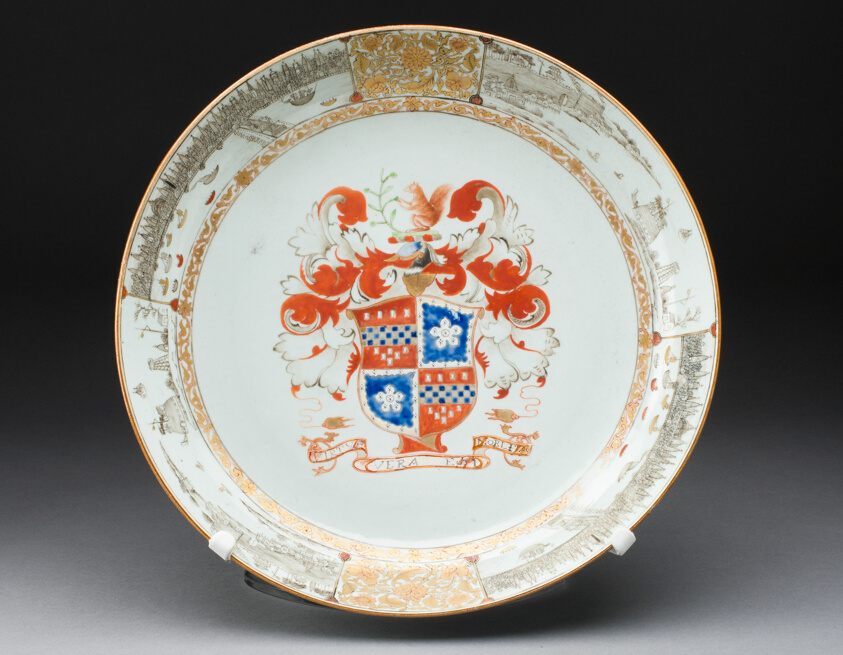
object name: Ceramics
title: Dish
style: chinese export, Chinese (culture or style), East Asian, asian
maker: China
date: c. 1733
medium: Hard-paste porcelain with polychrome enamels and gilding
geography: China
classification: dish (vessel); chinese export porcelain; porcelain; european decorative arts; ceramics